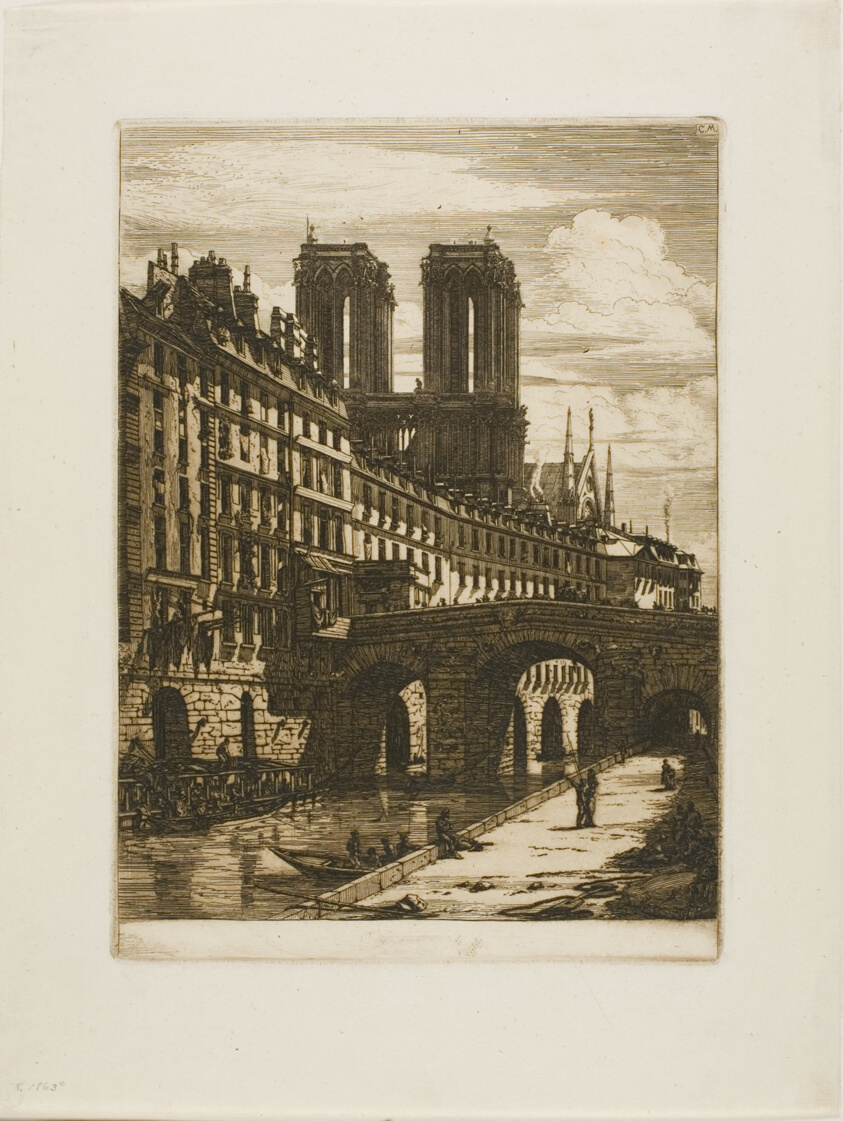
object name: Print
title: Le Petit Pont, Paris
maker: Charles Meryon (French, 1821-1868)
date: 1850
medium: Etching and engraving in dark brown on ivory laid paper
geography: France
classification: etching; print; prints and drawing